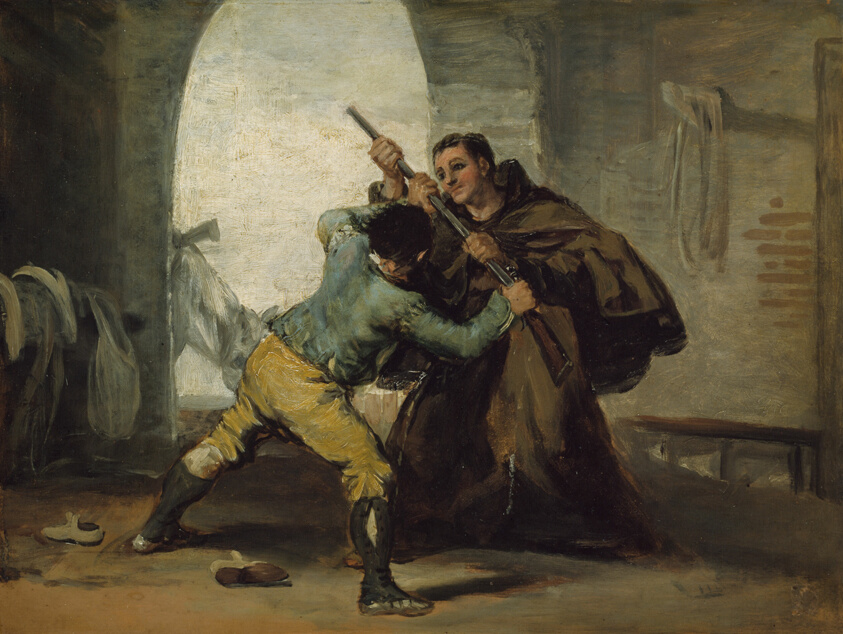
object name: Painting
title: Friar Pedro Wrests the Gun from El Maragato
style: nineteenth century, 19th century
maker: Francisco José de Goya y Lucientes (Spanish, 1746–1828)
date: c. 1806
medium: Oil on panel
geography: Spain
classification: painting; oil on panel; oil paintings (visual works); paint; spanish; european painting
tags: Century of Progress, exterior, brown (color), man, men, friars, guns, violence, world's fairs, Chicago World's Fairs